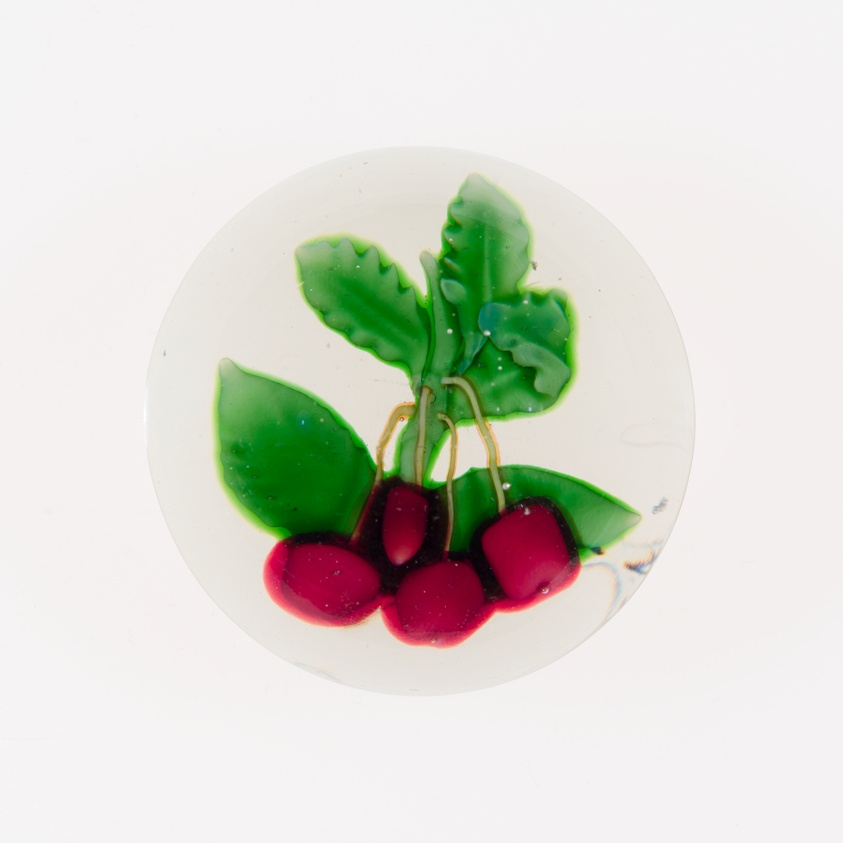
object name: Glass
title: Paperweight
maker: Saint-Louis Glassworks (Cristalleries de Saint-Louis); Lorraine, France, founded 1586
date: 19th century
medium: Glass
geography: Saint-Louis-lès-Bitche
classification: paperweight; lampwork; european decorative arts; glass